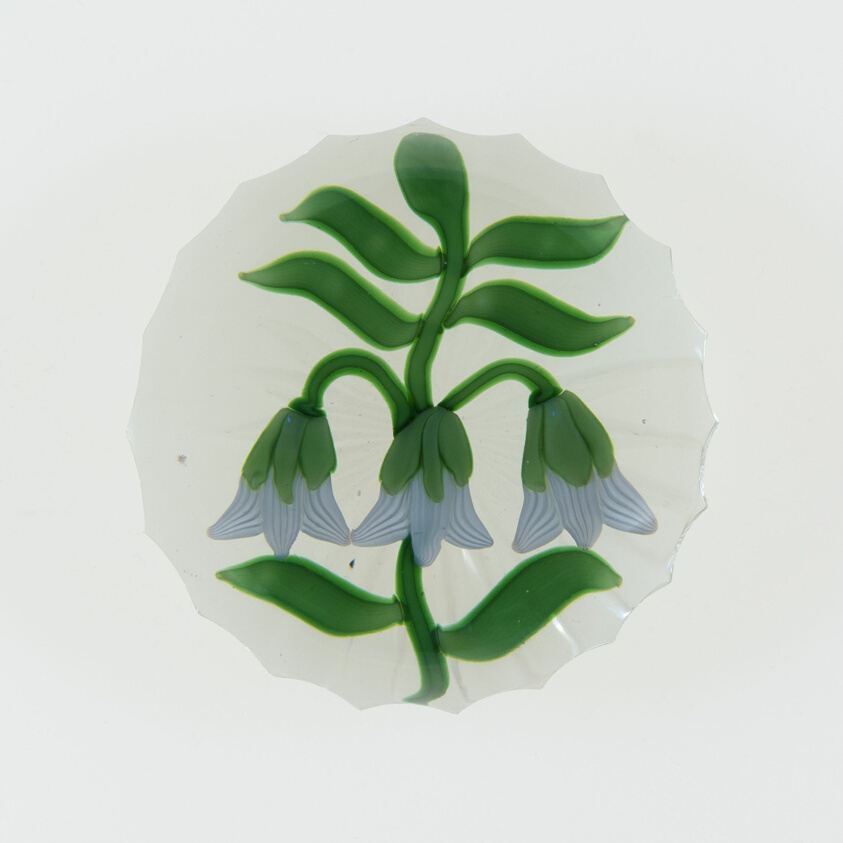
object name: Glass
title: Paperweight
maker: English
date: c. 1845–60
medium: Glass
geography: England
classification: paperweight; european decorative arts; glass